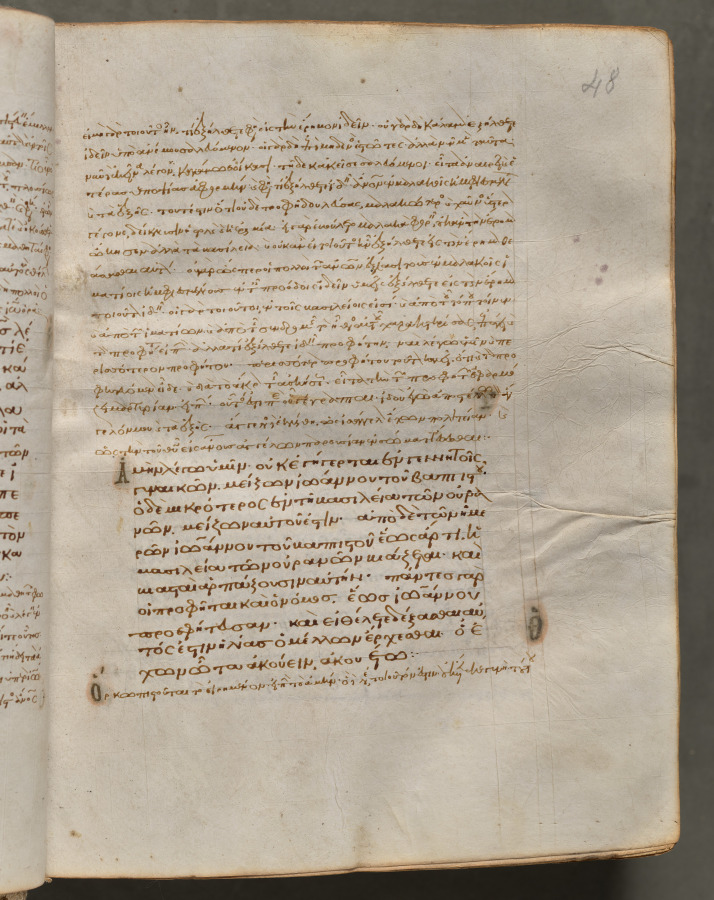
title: Text, folio 48 (recto), from a Gospel Book with Commentaries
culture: Byzantium, Constantinople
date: c. 1000–1100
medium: ink, tempera, and gold on vellum; leather binding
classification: Bound Volume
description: Each of the four gospels in this book opens on a page with brilliantly illuminated borders depicting the author of the text as well as birds-principally peacocks, symbols of the immortality of the soul-and fountains, representing the fountain of life and the salvation of the soul. This volume consists of 428 leaves with texts in Greek. Its level of sophistication suggests that it was probably written and decorated in a monastery in Constantinople.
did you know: Gospel Books were carried in procession through Byzantine churches.